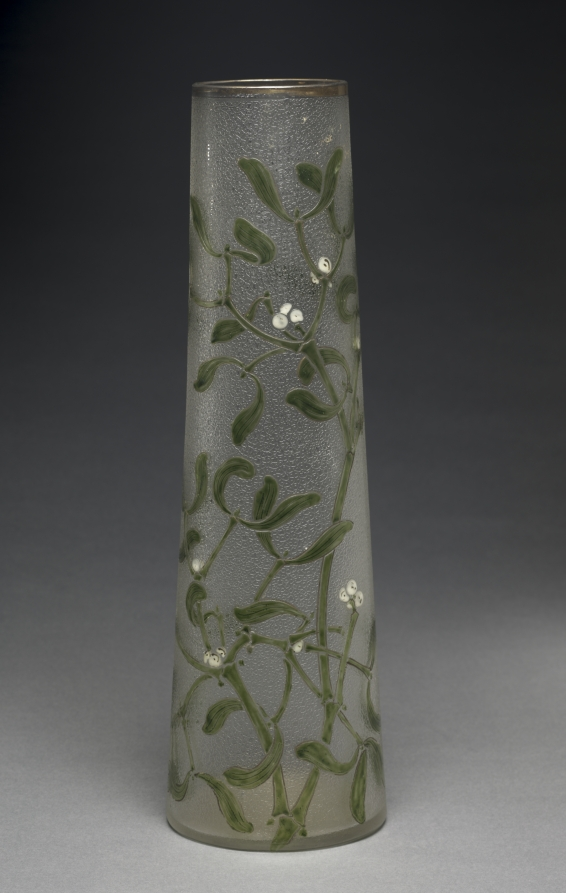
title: Tall Vase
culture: France, Clichy, late 19th-early 20th Century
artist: attributed to Appert Frères (French)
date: c. 1900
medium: glass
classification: Glass